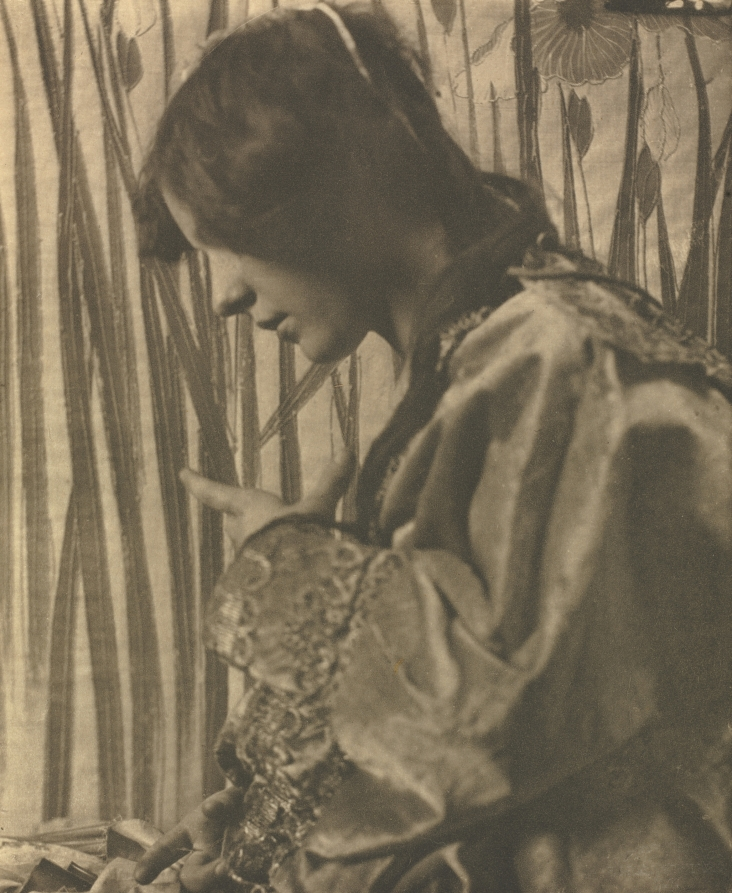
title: Camera Work: Angela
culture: America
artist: F. Benedict Herzog (American, c. 1859–1912)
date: 1905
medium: photogravure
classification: Bound Volume